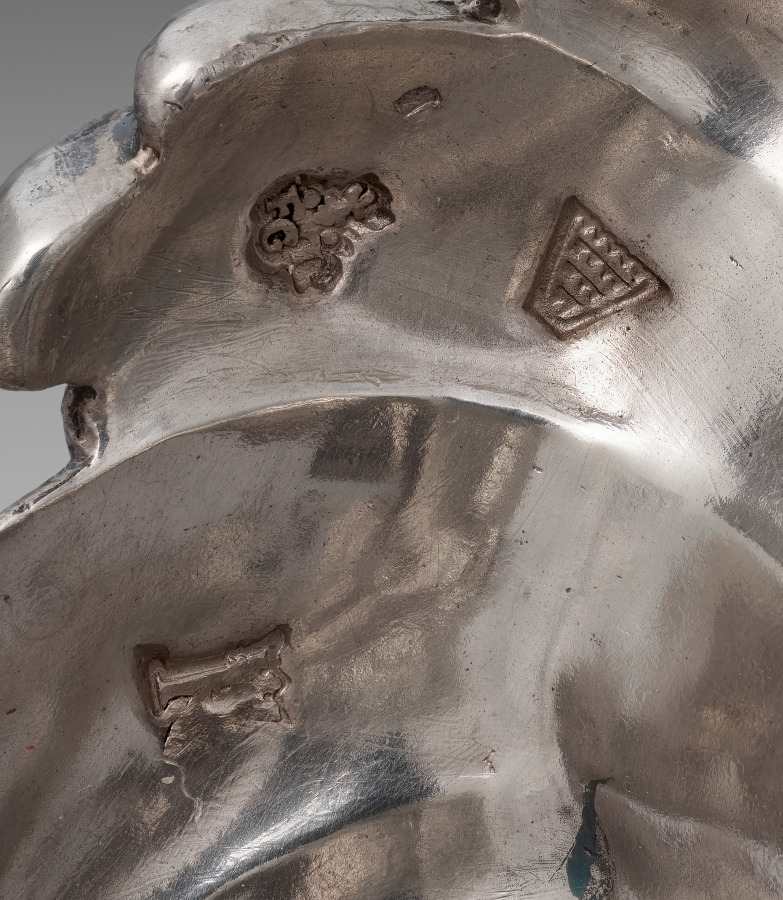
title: Candelabrum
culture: France, Paris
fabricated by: François Thomas Germain (French, 1726–1791)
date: 1757–1758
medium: silver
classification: Silver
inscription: [Maker’s mark of Francois-Thomas Germain, beneath base]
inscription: [Charge mark of Eloy Brichard, 1756−1762, beneath base]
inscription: [Warden's mark For Paris, 1757−1758, beneath base]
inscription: [Discharge mark for work intended for export, 1756−1775, beneath base]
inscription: [Discharge mark for work intended for export, 1756−1775, on base]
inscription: [Hallmarks for Saint Petersburg, on base]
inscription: [Assay mark of Ivan Frolov, on base]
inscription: [Russian standard of the French silver, on base]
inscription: [Maker’s mark of Francois-Thomas Germain, master silversmith on October 16, 1748, beneath drip pan of each three bobeches]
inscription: [Charge Mark Of Eloy Brichard, 1756−1762, beneath drip pan of each three bobeches]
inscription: [Discharge mark for work intended for export, probably 1733−1775, beneath drip pan of each three bobeches]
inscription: [Warden's mark for Paris, 1757-1758, beneath drip pan of each three bobeches]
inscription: [Russian standard of the French silver, beneath drip pan of one of three bobeches]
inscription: [Assay mark of Ivan Frolov, beneath drip pan of one of three bobeches]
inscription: [Charge mark for large work of Eloy Brichard, 1756−1762, on bayonet attachment of candelabra]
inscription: [Warden's mark for Paris, 1757-1758, on bayonet attachment of candelabra]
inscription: [Illegible mark in a square, on one bobeche]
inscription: [Engraved beneath base]: “Fait. Par. F. T. Germain. Sculp[teu]r. Orf[ev]re. Du Roy. Aux. Galleries. Du Louvre. A Paris- 1758”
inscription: [Engraved beneath base]: "Du no. 31"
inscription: [Beneath base]:"No 463"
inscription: [Russian Imperial Coat-of-arms, engraved beneath base]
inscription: [Modern inscription with black ink, beneath base]: "L5 ... 51/w-8"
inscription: [Modern inscription (illegible) in a rectangular paper label on the base, engraved. Cipher composed with two “M”’s (?) surmounted by a royal crown]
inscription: [Engraved on candelabra bayonet attachment]: "No 463"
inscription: [On candelabra bayonet attachment]: "du No 31"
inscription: [Engraved cipher with two "M"s (?) surmounted by a royal crown, on one bobeche]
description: This candelabrum is part of a pair. Its design blurs the line between function and decoration. The arms twist and curve, visually flower stems while physically supporting the candles. Though this visual unity is typical of the rococo style, the influence of the rising neoclassical style is evident in the allegorical scenes of light that decorate each candelabra’s stem.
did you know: These candelabra are part of a dinner service sent from Paris, France to Saint-Petersburg, Russia in two separate shipments, the first of which contained 270 objects for 8 dozen place settings.